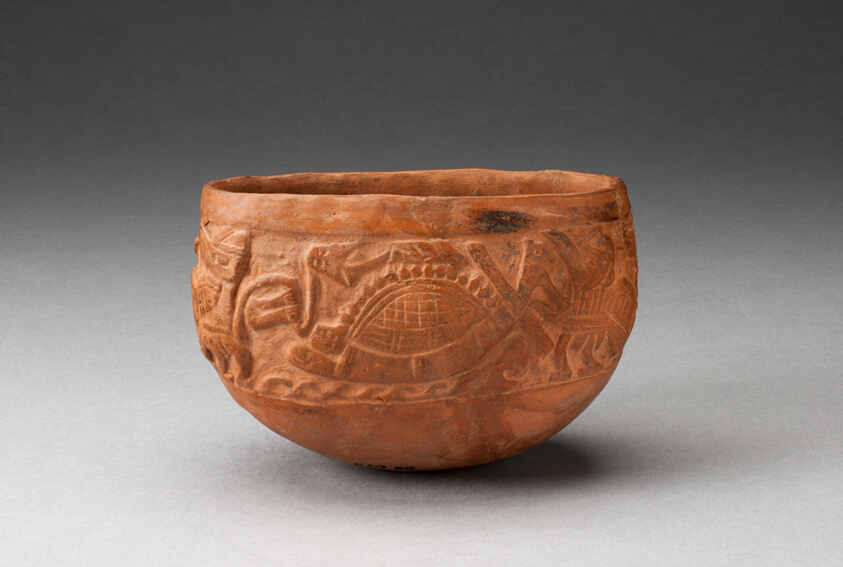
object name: Vessel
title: Cup with Raised Marine Scene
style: moche, mochica v, mochica, early intermediate period, Pre-Columbian, americas, Arts of the Americas, andean, andes, south american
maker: Moche (North coast, Peru)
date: 100 BCE–500 CE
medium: Ceramic and pigment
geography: Peruvian North Coast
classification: earthenware; ceramics; vessel; art of the americas